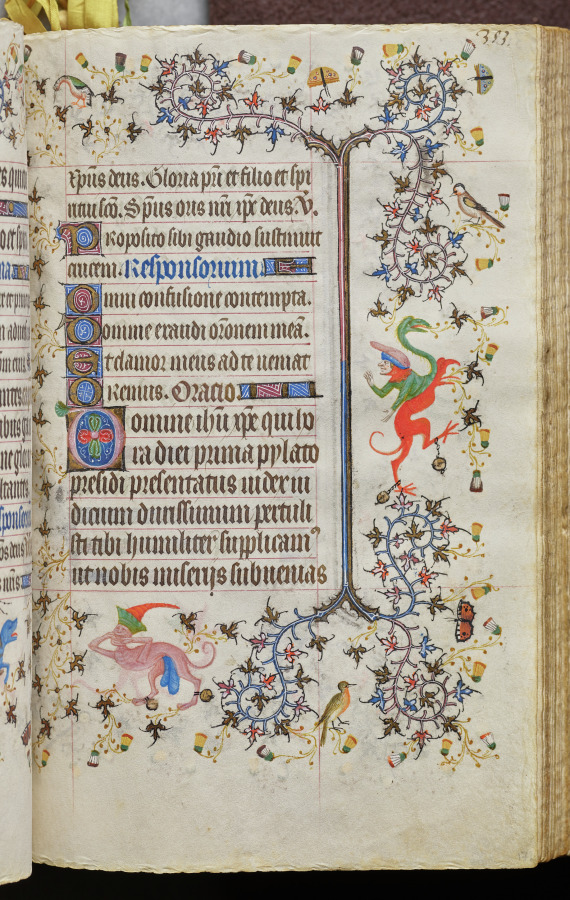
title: Hours of Charles the Noble, King of Navarre (1361-1425): fol. 172r, Text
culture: France, Paris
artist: Master of the Brussels Initials and Associates (French)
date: c. 1405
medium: ink, tempera, and gold on vellum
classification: Bound Volume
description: This precious volume was obviously highly prized by its owner, the French-born King of Navarre, who had his coat of arms painted on no less than twenty folios. Rather than directly commissioning this manuscript from a specific workshop, it seems that Charles the Noble acquired his book of hours -- perhaps ready-made for the luxury market -- while on a trip to Paris in 1404-05. A collaborative effort, six painting styles are evidenced within the pages of this codex, those of two Italians, two Frenchmen, and two Netherlanders. The painter who was responsible for the planning and decoration of the book, and who produced seventeen of the large miniatures, was a Bolognese artist known as the Master of the Brussels Initials. His principal assistant, responsible for most of the borders, was a Florentine who signed his name "Zecho" da Firenze on folio 208 verso.